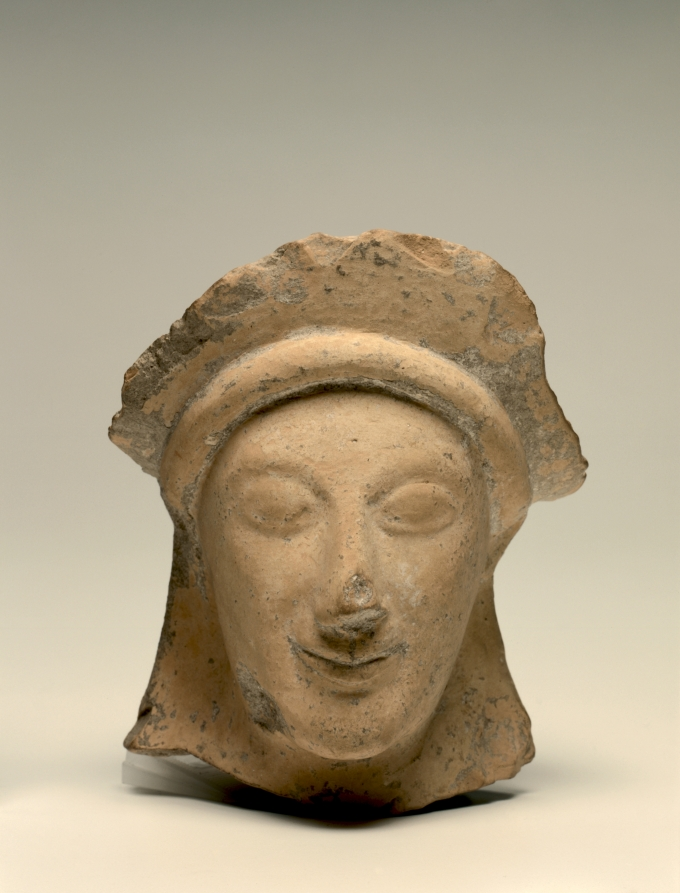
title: Woman's Head with Crown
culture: Greece, Sicily(?)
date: 500s BCE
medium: terracotta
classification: Sculpture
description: This terracotta sculpture depicts a woman with a wide headdress that is partly broken off. Her face is rendered in an Archaic style, with her mouth and eyes in low relief and her lips lifting upward in a serene smile. Originally, details such as the eyes and decoration on the headdress would probably have been painted on the surface of the sculpture.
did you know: In ancient Greek sculpture, a wide crown often denoted a matron deity like Hera or Demeter.